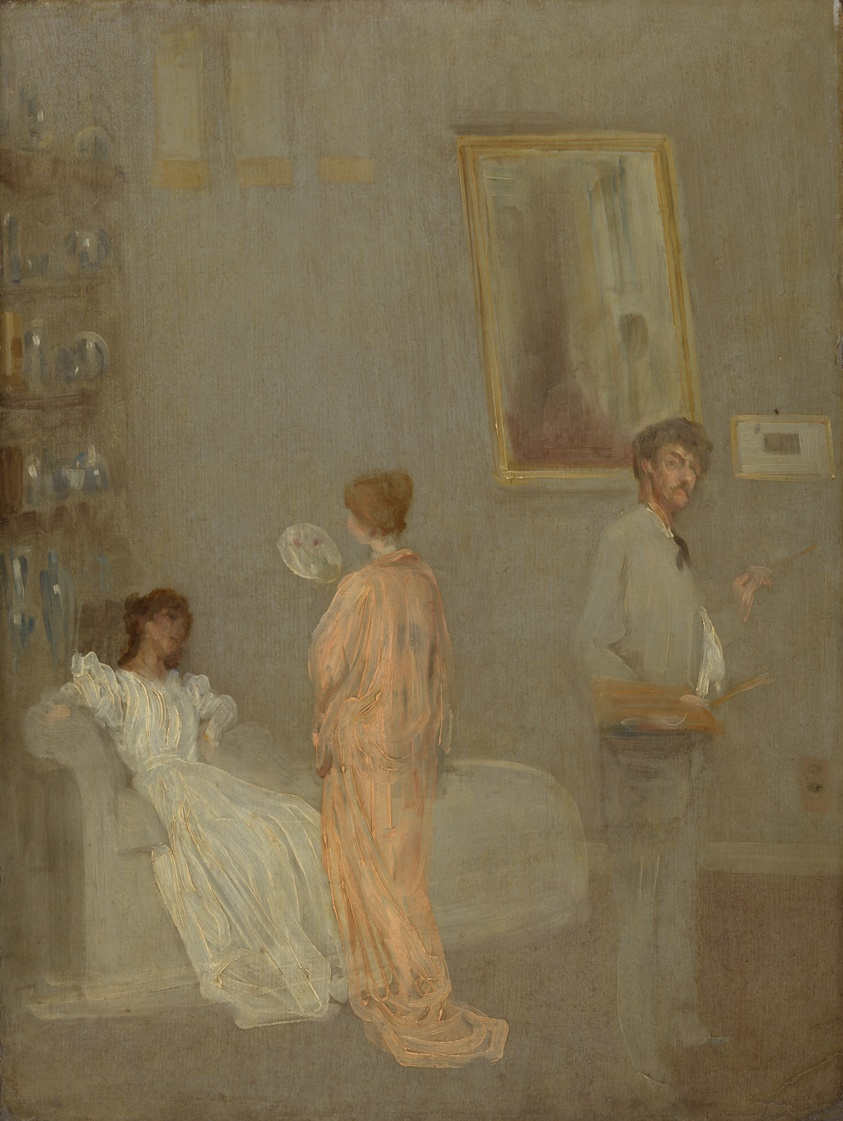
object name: Painting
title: The Artist in His Studio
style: Impressionism, Modernism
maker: James McNeill Whistler (American, 1834–1903)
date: 1865–66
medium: Oil on paper mounted on panel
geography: London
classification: painting; american arts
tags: people, women, portraits, men, work, fashion